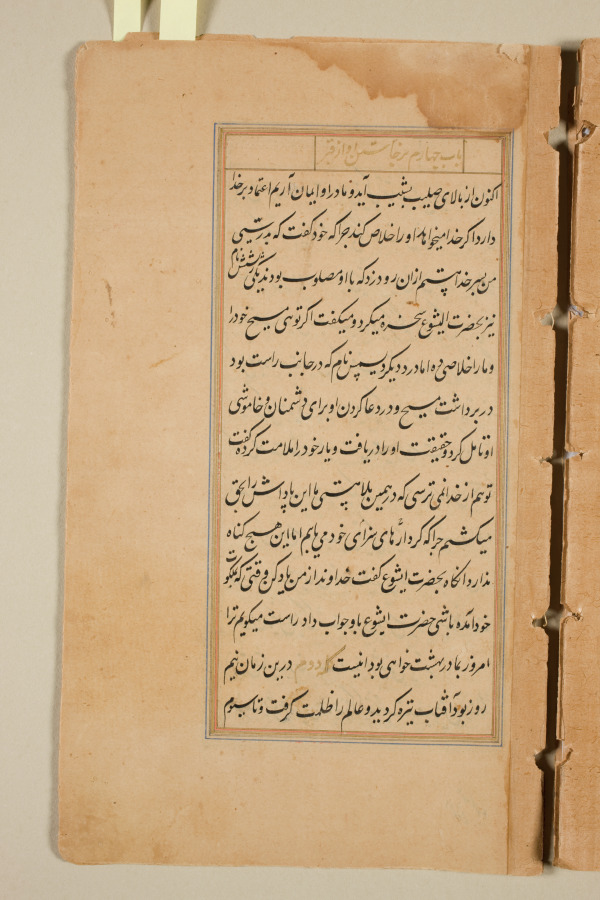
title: Text page from a Mirror of Holiness (Mir’at al-quds) of Father Jerome Xavier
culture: Mughal India, Allahabad, made for Prince Salim (1569–1627)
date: 1602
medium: Ink and gold on paper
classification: Manuscript